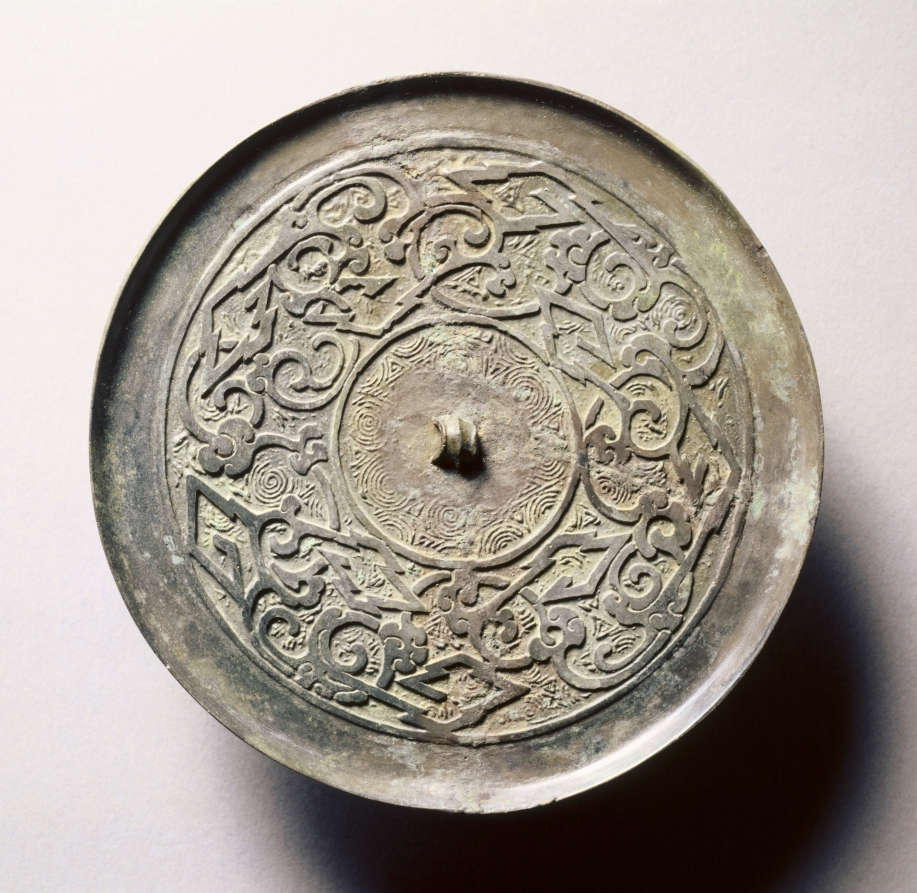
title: Mirror with Serpentine Interlaces and Angular Meanders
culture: China, Eastern Zhou dynasty (770–256 BCE), Warring States period (475–221 BCE)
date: early 500s–late 300s BCE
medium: bronze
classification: Metalwork